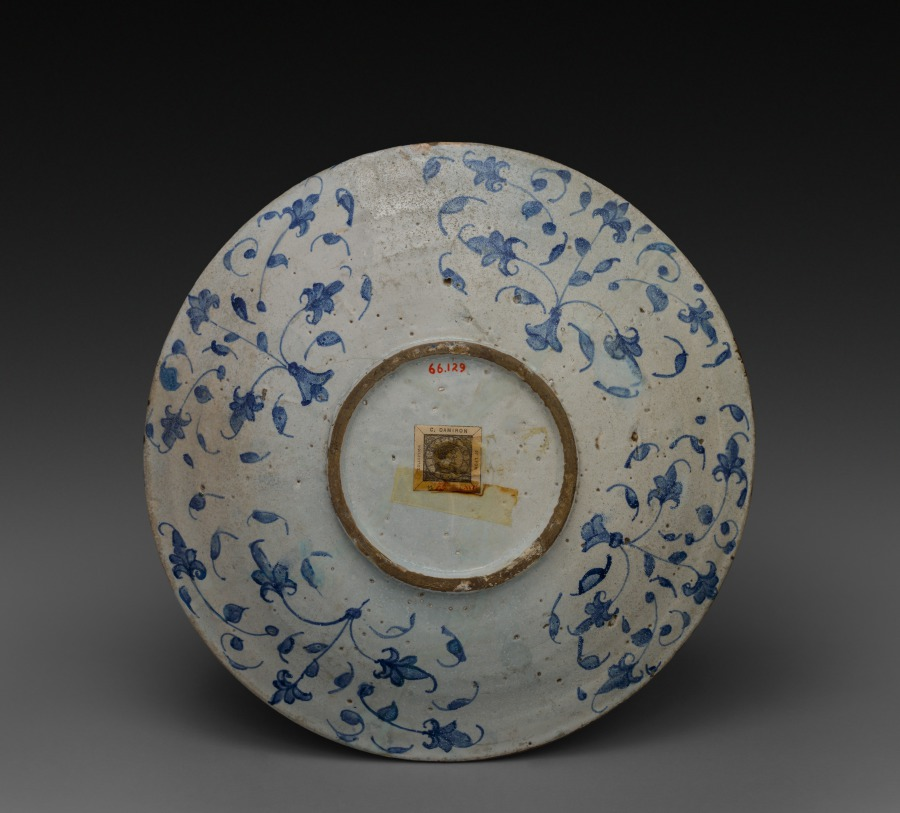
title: Plate: Man Riding a Unicorn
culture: Italy, 16th century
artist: circle of Jacopo Caffagiolo (Italian)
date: c. 1510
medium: tin-glazed earthenware (maiolica)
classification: Ceramic